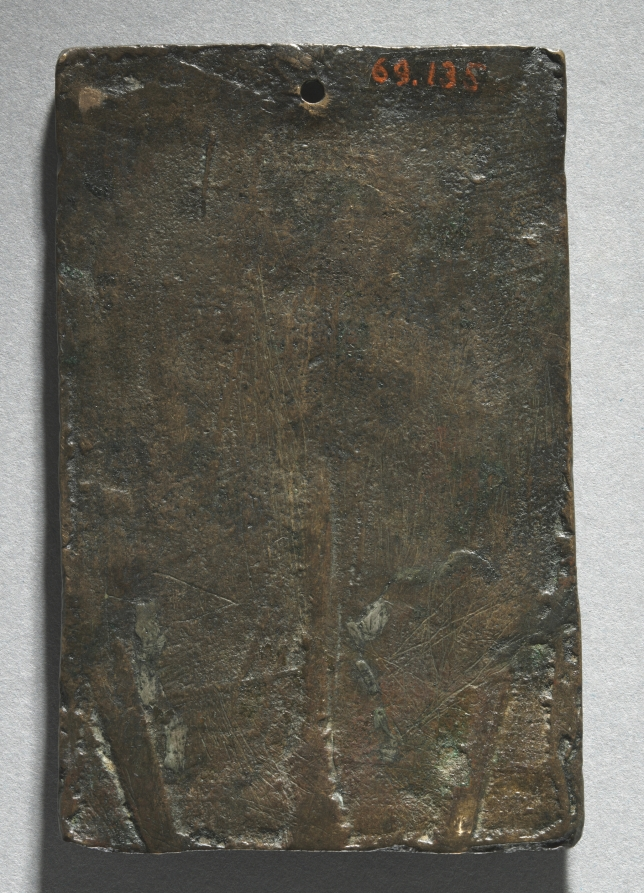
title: Saint Jerome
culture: Italy, Padua?, 16th century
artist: cast after a model by Ulocrino (Italian)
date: 1500s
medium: bronze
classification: Sculpture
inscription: inscribed across top: VLOCRINO.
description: During the Renaissance, humanist scholars sought to revive not only the Greek and Roman past, but also the early Christian era. Among the most fully studied figures of Christian antiquity was Saint Jerome, whose letters were widely read and vividly describe his physical and spiritual trials in the Syrian desert. Here Jerome appears in such a setting between a broken classical arch and rocky cliff, on the ledges of which are an open book and skull. In his extended right hand he holds a stone that he used to beat his breast while living as an ascetic. In the lower left corner a lion, the legendary companion of the saint, sits beside a closed book. The inscribed signature Ulocrino appears on a number of plaquettes in the early 1500s that stylistically relate to the work of Paduan sculptors from this period. Attempts to identify this artist have prompted a number of proposals: the most intriguing suggests that "Ulocrino" is a pseudonym made from the Greek oulos and the Latin crinis, meaning curly-haired, for Andrea Briosco, better known by the nickname Riccio on account of his wavy hair. Riccio was one of the most renowned Paduan bronze sculptors of the 1500s.